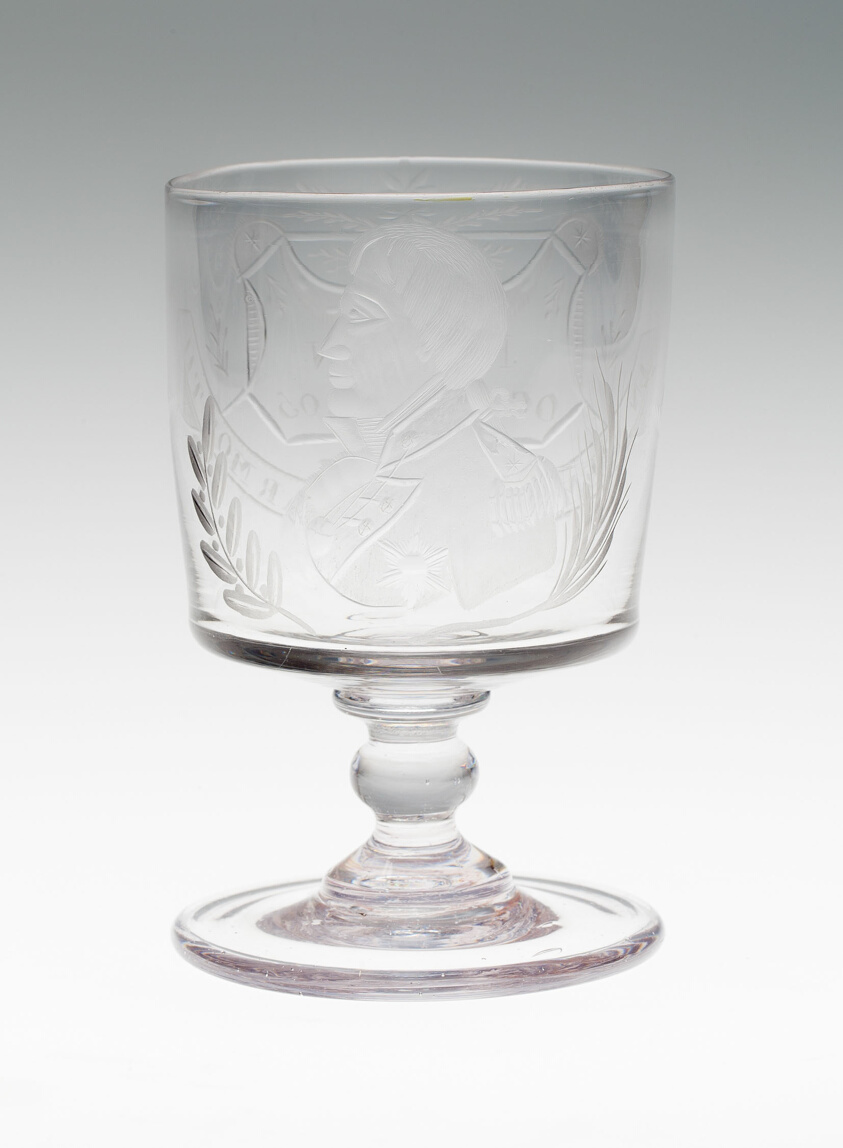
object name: Glass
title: Goblet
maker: England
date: 1805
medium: Glass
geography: England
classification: glass; european decorative arts